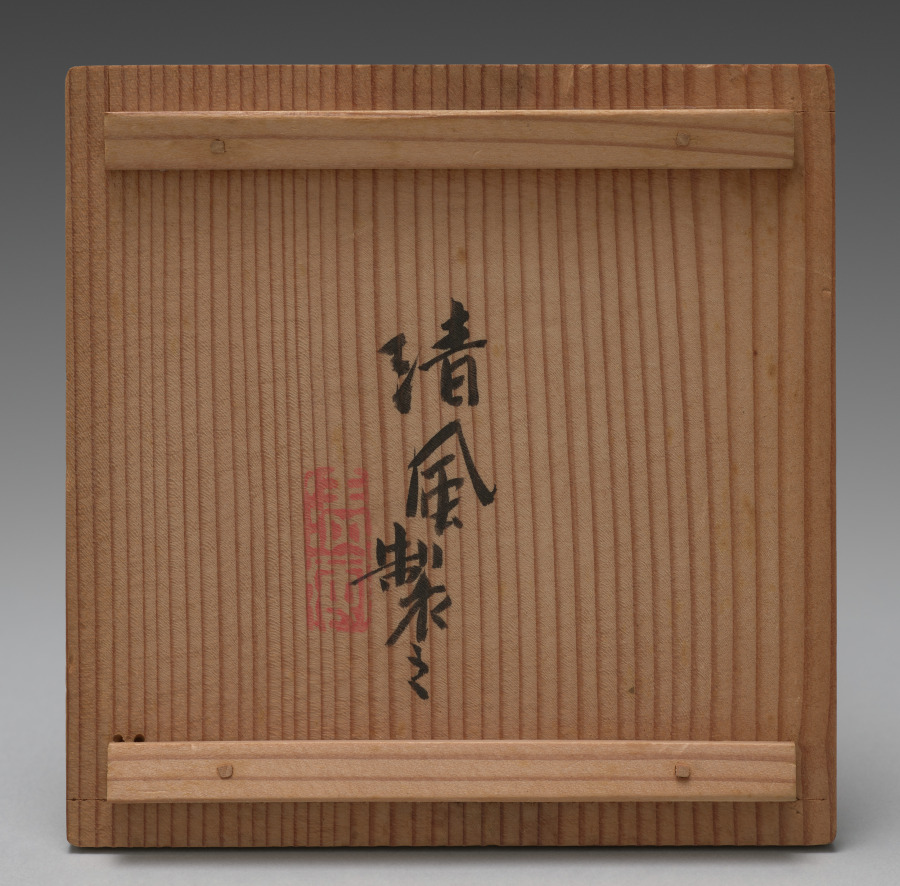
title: Teapot with Cherry Blossoms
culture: Japan, Taishō period (1912–26) or Shōwa period (1926–89)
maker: Seifū Yohei IV (Japanese, 1872–1951)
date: 1914–46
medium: Porcelain with underglaze blue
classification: Ceramic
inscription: 清風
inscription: 清風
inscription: 清風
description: This teapot with mountain cherry blossom motifs has its design in underglaze cobalt blue. It runs over both the pear-shaped body and the recessed lid, with its pointed, jewel-shaped handle. There is a faint bluish-green tint to the glaze. The mark impressed into the base of this work appears to be one used by Yohei III. However, the box inscription is brushed in a hand matching that of Yohei IV, and while the seal on the lid is one often used by Yohei III, that next to the signature on the back of the lid is one generally used by Yohei IV. The signature, too, resembles others belonging to Yohei IV. As the design, technique, and object named on the box accurately describe the contents, it seems unlikely, but not impossible, that it is mismatched. There are many cases in which Yohei III works are contained in boxes with inscriptions, seals, and a signature by Yohei IV. However, in such examples, Yohei IV clearly identifies himself as authenticating the work of his father and often includes his father’s Imperial Household Artist seal. This may be an example of a transitional piece in which Yohei IV has used his father’s mark on the base of his own work.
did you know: Cherry blossoms mark the arrival of spring, and their short-lived beauty is deeply anticipated and appreciated.